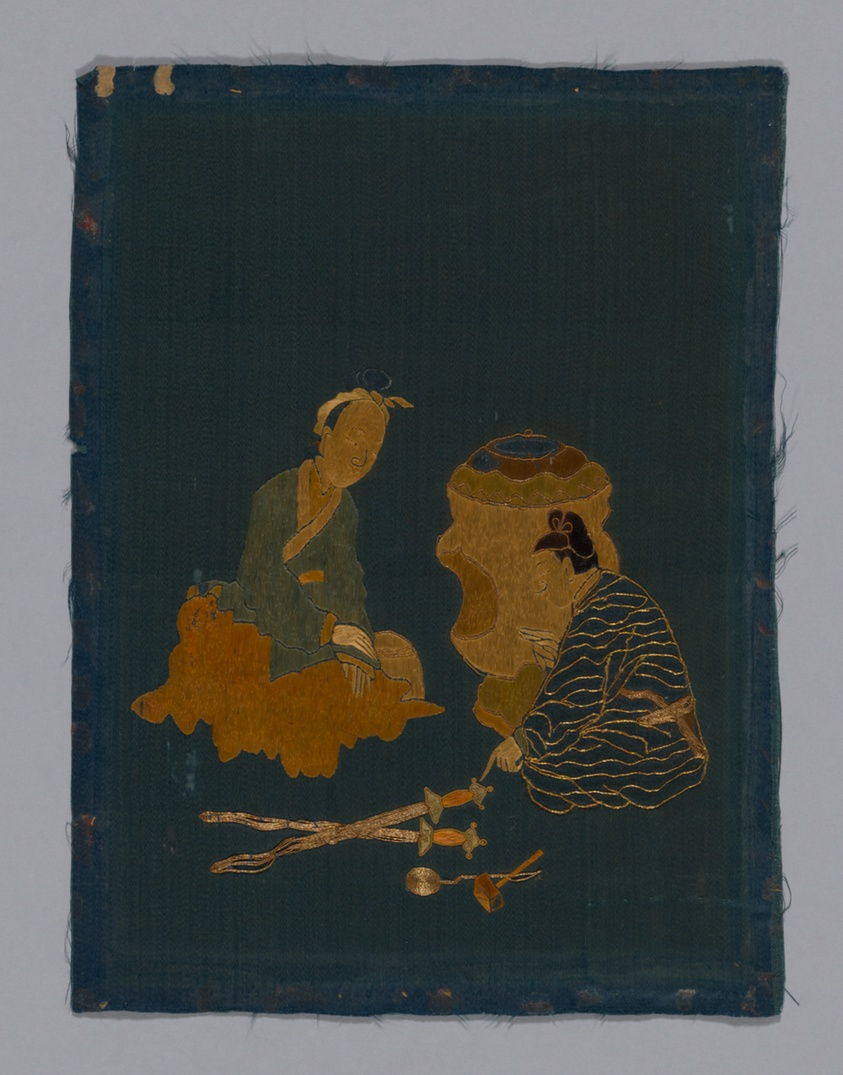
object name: Textile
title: Panel piece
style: qing, kangxi, Chinese (culture or style), East Asian, asian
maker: China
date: Qing dynasty (1644–1911), 1800/50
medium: Satin, with couched cord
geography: China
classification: textile; weaving